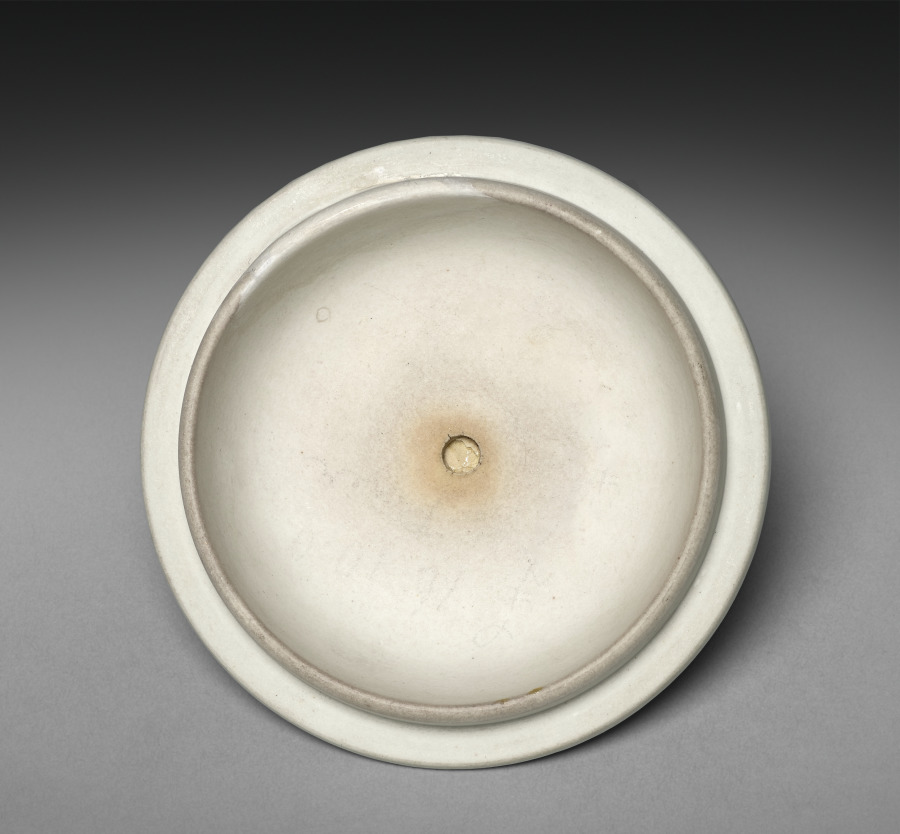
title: Cover for a Vase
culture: England, Staffordshire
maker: Josiah Wedgwood and Sons (British, Staffordshire, est. 1759)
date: c. 1850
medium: jasper ware with relief decoration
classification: Ceramic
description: Wedgwood's tricolor jasperware first became popular in the 1770s during a period of fascination with neoclassical decoration. This vase was probably made around 1850 during the period when this type of decoration was revived. The relief medallions depict two versions of the Greek god Apollo, the god of music, next to his harp or lyre.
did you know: See cover record.